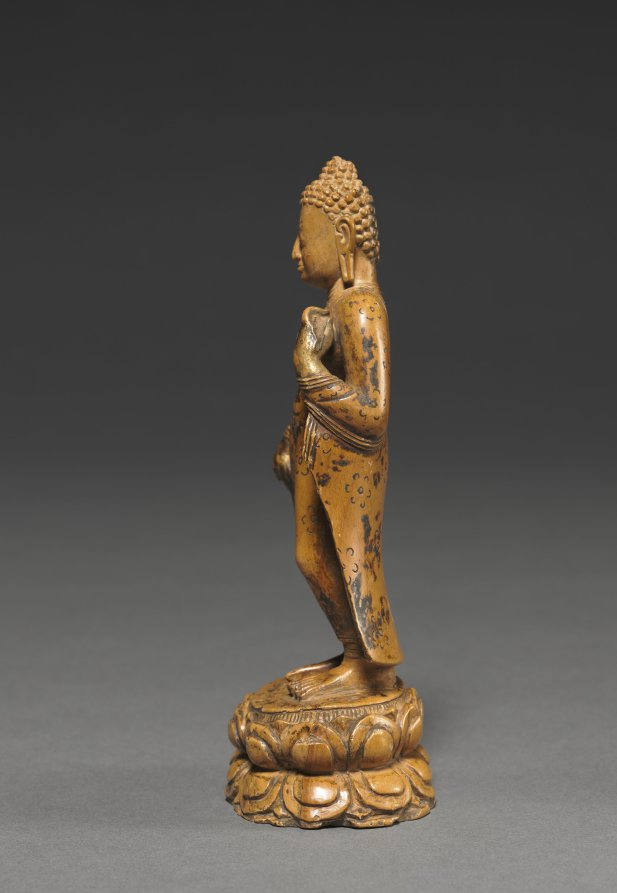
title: Standing Buddha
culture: Burma (Myanmar)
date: c. 800s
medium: Kaolin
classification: Sculpture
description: This small sculpture was probably part of a set of eight main scenes from the life of the Buddha, each identified by a specific hand gesture. When the standing Buddha gestures down with his right hand, with the palm facing out, he usually signals his miraculous descent from the Heaven of the Thirty-three Gods, where he once spent a monsoon season giving teachings to his mother. She died shortly after his birth and was reborn in the heaven.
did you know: The robe is covered with flowers on the front and back, possibly alluding to the flowers falling from heaven as the Buddha descended back to earth.